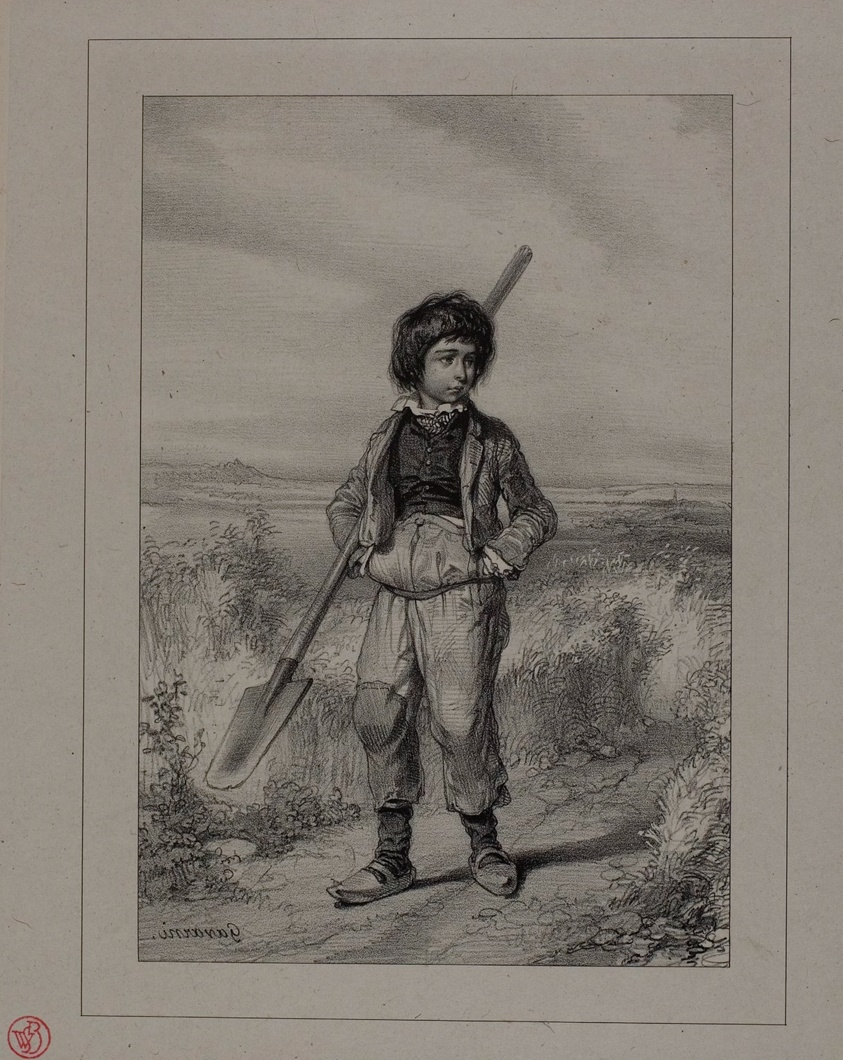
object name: Print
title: The Little Roadman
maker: Paul Gavarni (French, 1804-1866)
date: c. 1835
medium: Lithograph in black on light gray China paper, laid down on cream wove paper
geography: France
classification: lithograph; print; prints and drawing